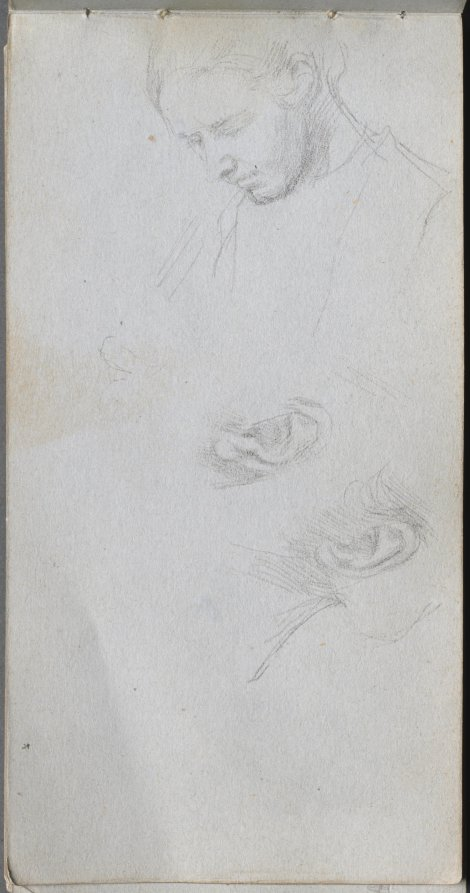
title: Sketchbook, page 96: Study of a Face, Ears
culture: France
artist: Ernest Meissonier (French, 1815–1891)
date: c. 1860s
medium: graphite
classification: Bound Volume